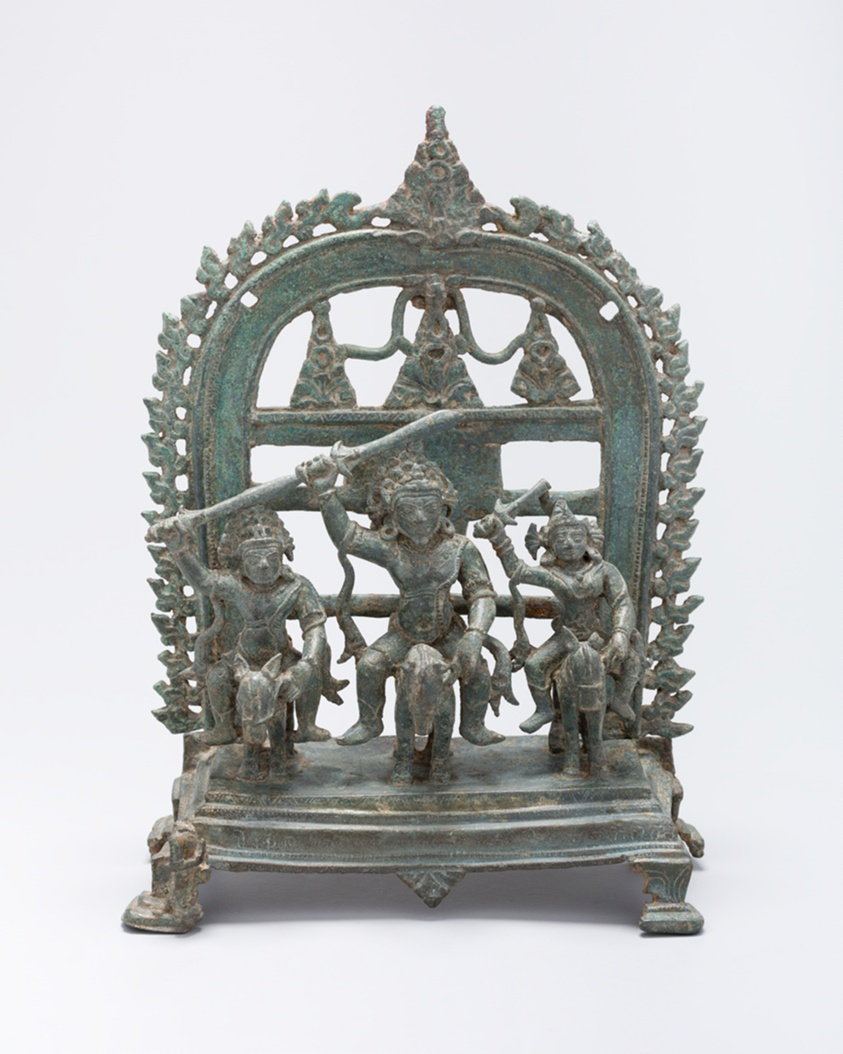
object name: Sculpture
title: Revanta, Son of Sun God Surya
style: South Asian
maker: Bangladesh; Rajshahi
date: c. 10th century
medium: Bronze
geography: Bangladesh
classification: bronze; metal; sculpture; asian art